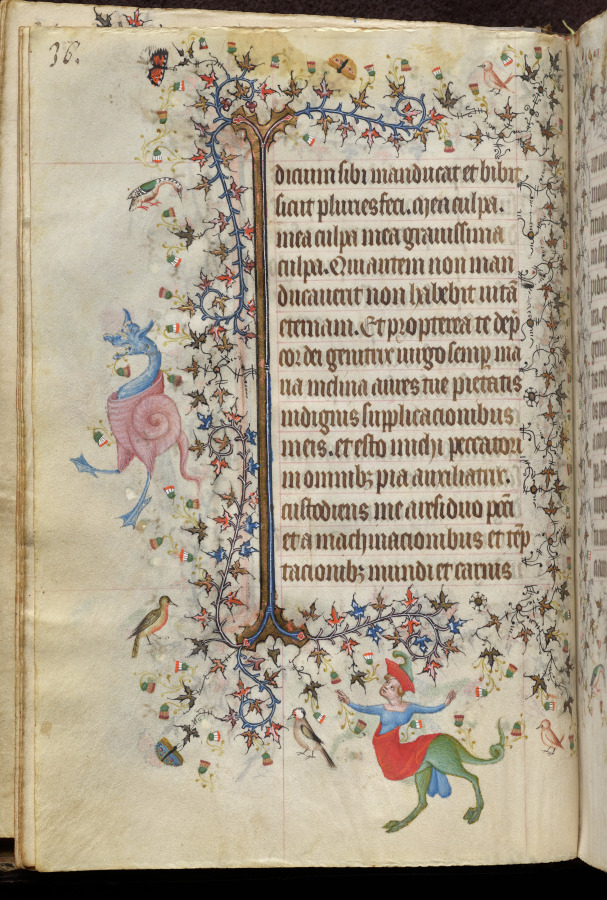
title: Hours of Charles the Noble, King of Navarre (1361-1425): fol. 18v, Text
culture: France, Paris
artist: Master of the Brussels Initials and Associates (French)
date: c. 1405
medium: ink, tempera, and gold on vellum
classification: Bound Volume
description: This precious book was highly prized by its owner, Charles III, King of Navarre, a French-born prince whose coat of arms is painted on 20 folios. Charles visited Paris on numerous occasions and likely acquired this volume there in 1404. Paris was the center of the European book trade at the time and attracted illuminators from many parts of Europe. This manuscript represents one of the most remarkable fusions of French and Italian taste in book illumination. Though conforming to Parisian standards, most of the book’s major miniatures are the work of the Brussels Initials Master, an Italian illuminator who previously worked in Bologna and Padua.